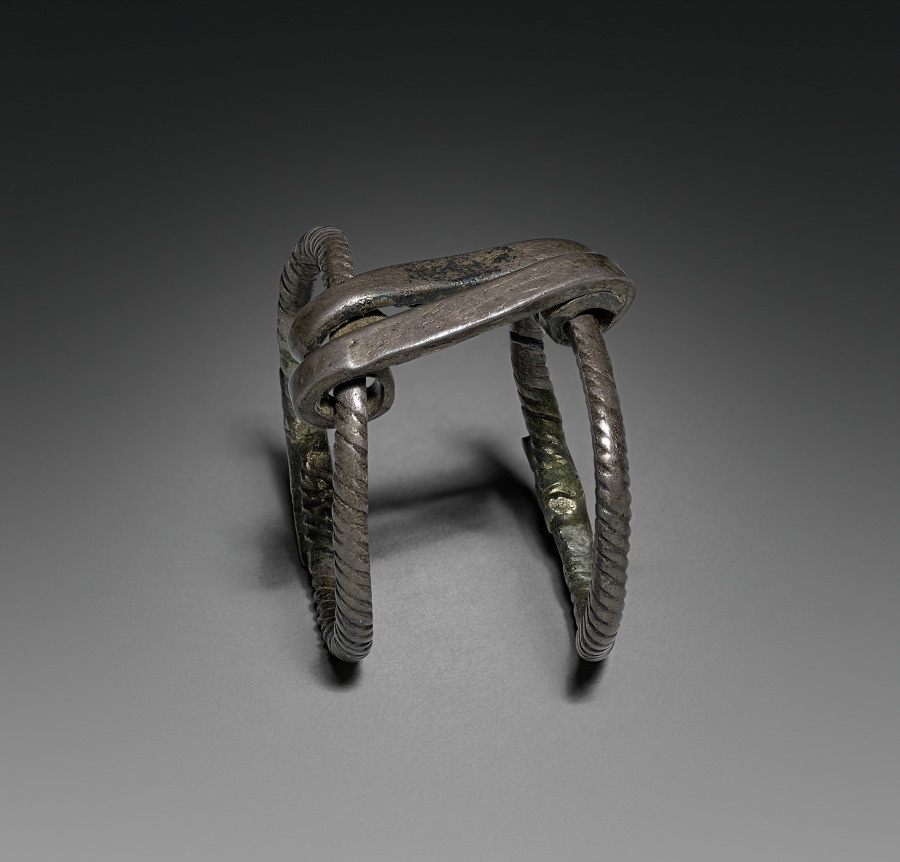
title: Ring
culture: India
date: 20th Century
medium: silver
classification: Jewelry